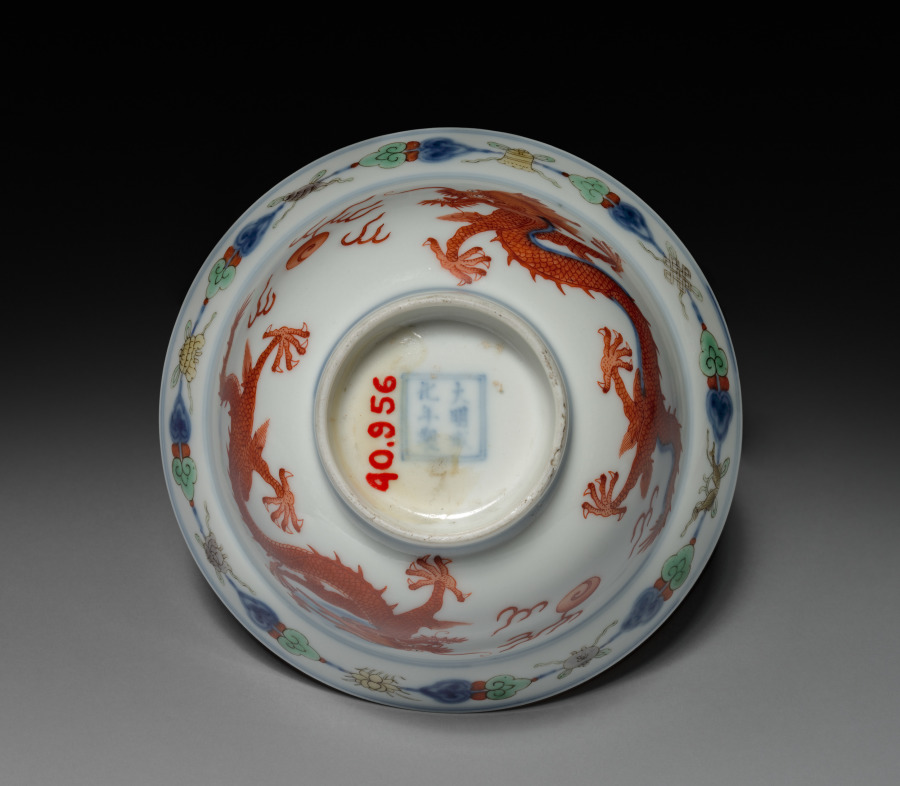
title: Bowl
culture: China, Jiangxi province, Jingdezhen kilns, Qing dynasty (1644-1911), Yongzheng mark and reign (1722-35)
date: 1723–35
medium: porcelain with doucai decoration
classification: Ceramic